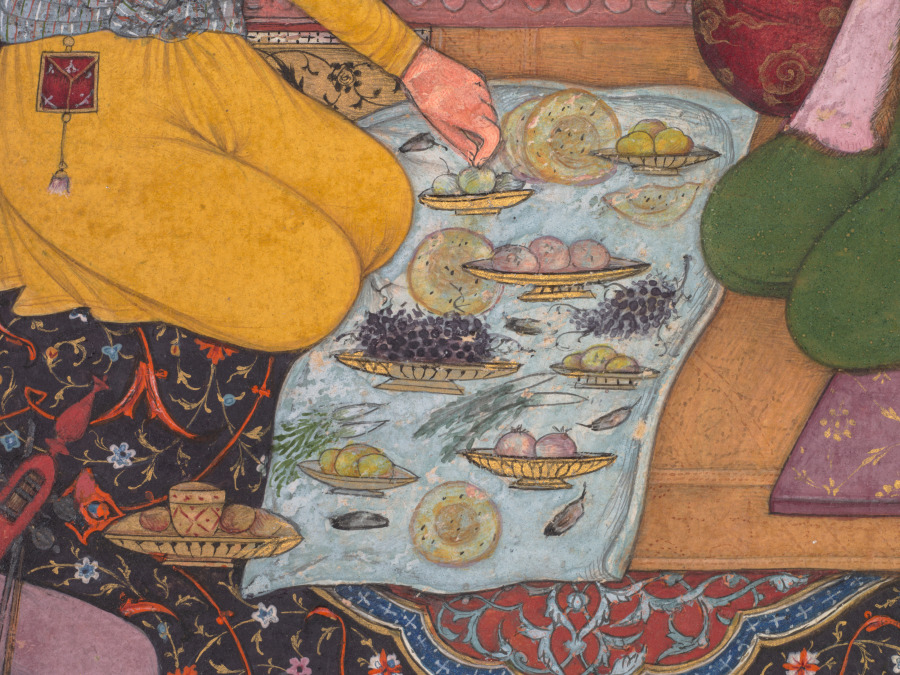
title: A Royal Picnic on a Terrace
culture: Mughal India, court of Akbar (reigned 1556–1605)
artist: attributed to Muhammad Ali (Persian, active 1590–1620)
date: c. 1620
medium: Gum tempera and gold on paper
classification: Painting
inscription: later Hindi inscription on reverse: Babur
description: A richly patterned carpet spans the width of the composition and forms the setting for a royal visit. The status of the highest-ranking person is indicated by the tan cloth placed over the carpet and the voluminous wine-colored cushion ornamented with stylized gold clouds. An attendant holding an emblem of Indian royalty, the fly whisk, stands to one side. At the far right of the carpet are two books, indicating that they are learned men. Like the carpet, the book covers have central medallions and borders, in line with the Persian aesthetic that the Mughals of India held in high regard.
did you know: A gentleman connoisseur has tucked a flowering sprig into his voluminous turban.